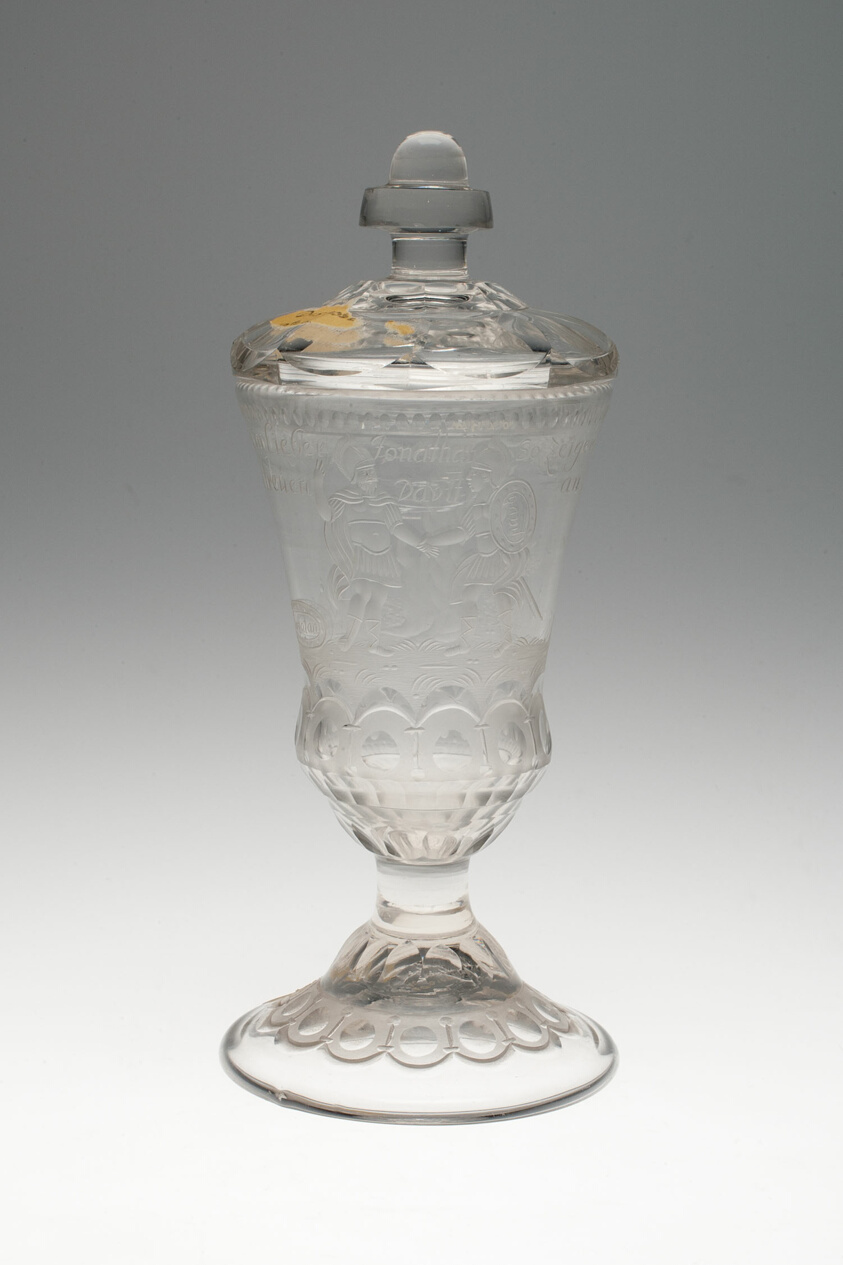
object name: Glass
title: Cup with Cover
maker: Germany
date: Mid 19th century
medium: Glass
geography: Germany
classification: drinking vessel; glass; european decorative arts